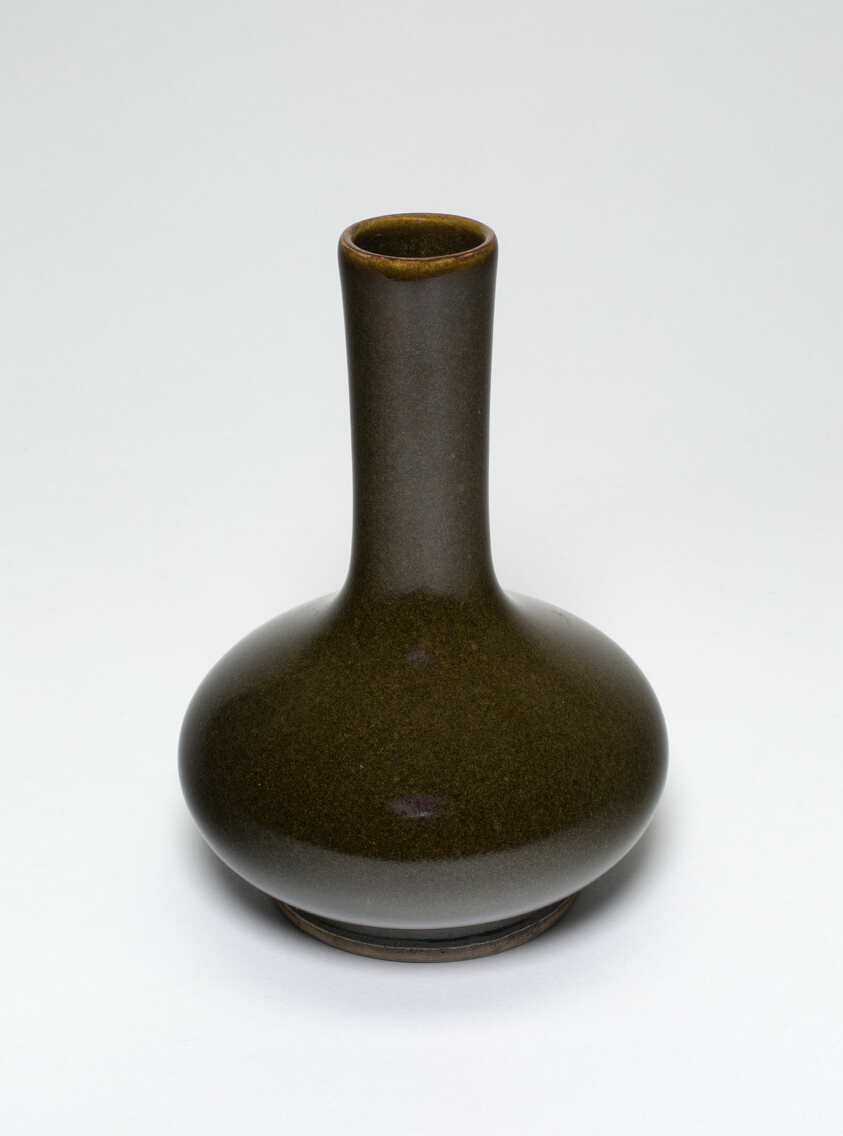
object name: Vessel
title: Bottle-Shaped Vase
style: Chinese (culture or style)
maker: China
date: Qing dynasty (1644–1911), c. 18th century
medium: Porcelain with tea dust glaze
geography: China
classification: vase; vessel; asian art; ceramics